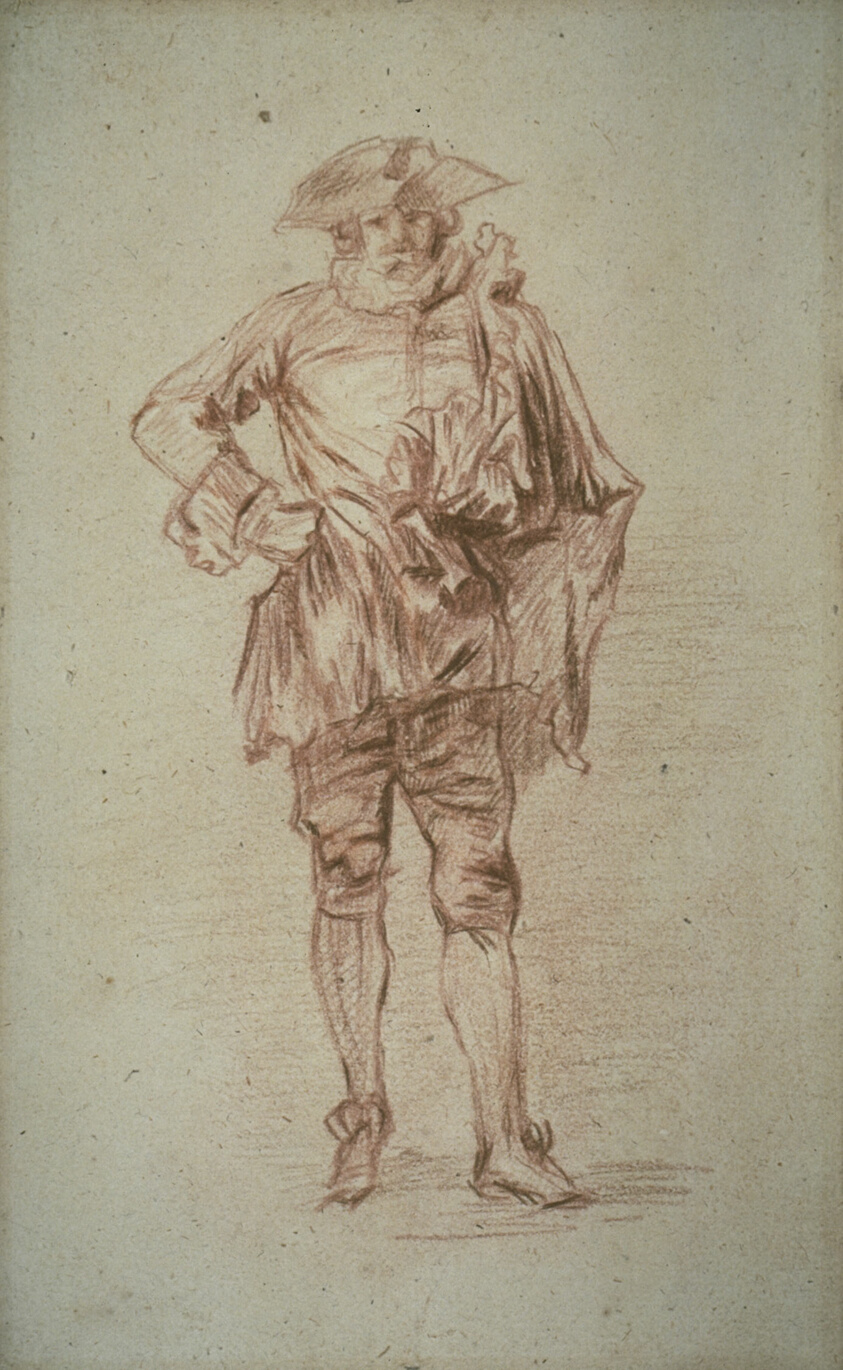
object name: Drawing and Watercolor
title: Standing Gentleman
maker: Nicolas Lancret (French, 1690-1743)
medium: Red chalk, with stumping, and touches of brown chalk, on tan laid paper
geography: France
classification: chalk; drawings (visual works); prints and drawing